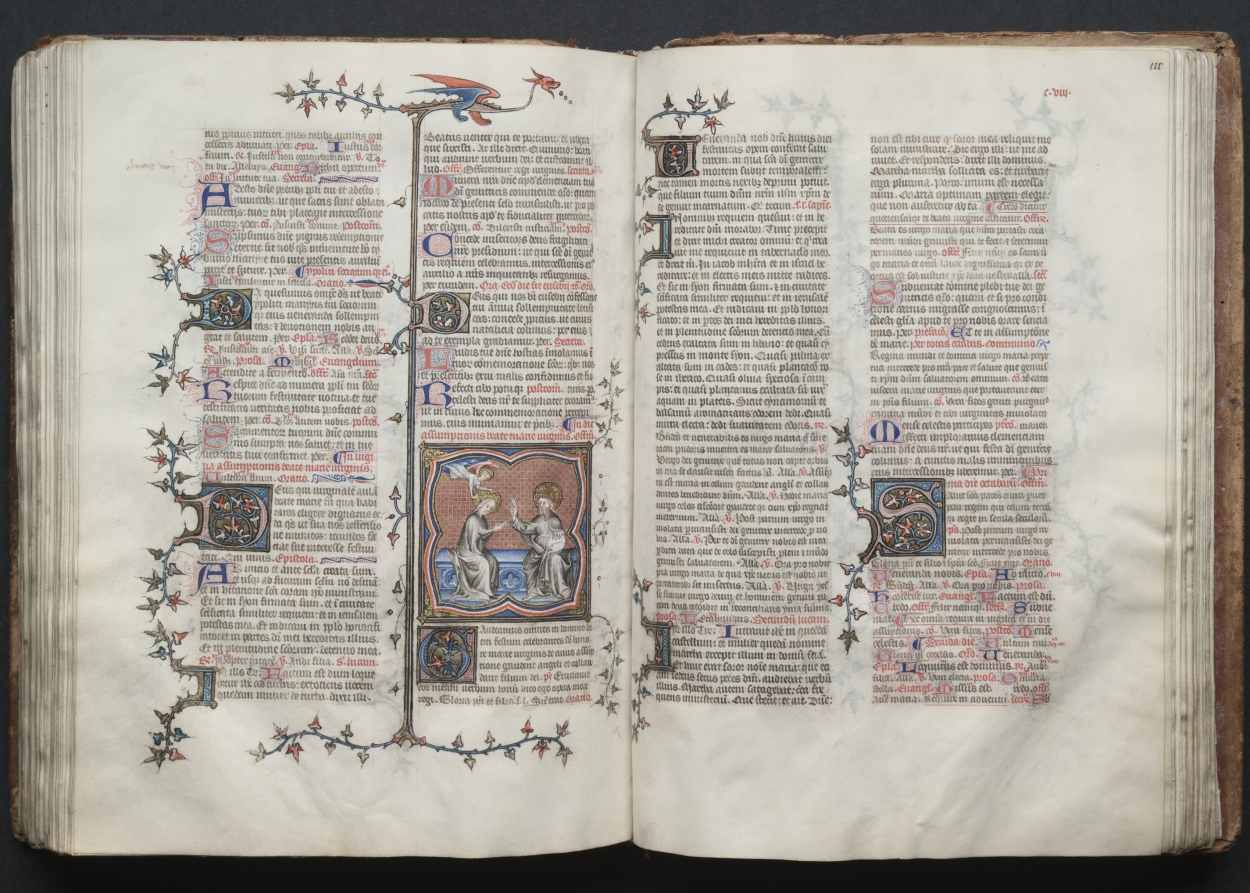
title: The Gotha Missal: Fol. 119v, The Coronation of the Virgin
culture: France, Paris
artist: Master of the Boqueteaux (French)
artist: and Workshop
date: c. 1375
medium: ink, tempera, and gold on vellum; blind-tooled leather binding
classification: Bound Volume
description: The style and quality of this manuscript's decoration is typical of deluxe Parisian books made for aristocratic or royal patrons. Most of the book's decoration appears to be the work of the Master of the Boqueteaux, an artist active at the court of King Charles V (died 1380). His style was apparently shared by a number of book illuminators working in and around Paris. It is very possible that the Gotha Missal belonged to Charles V, but is not provable because the manuscript has no royal portraits and lacks a colophon. Given the book's magnificent decoration, however, it would seem that it was produced for a Valois prince, if not for the king himself. The manuscript receives its name from the German dukes of Gotha, its later owners.